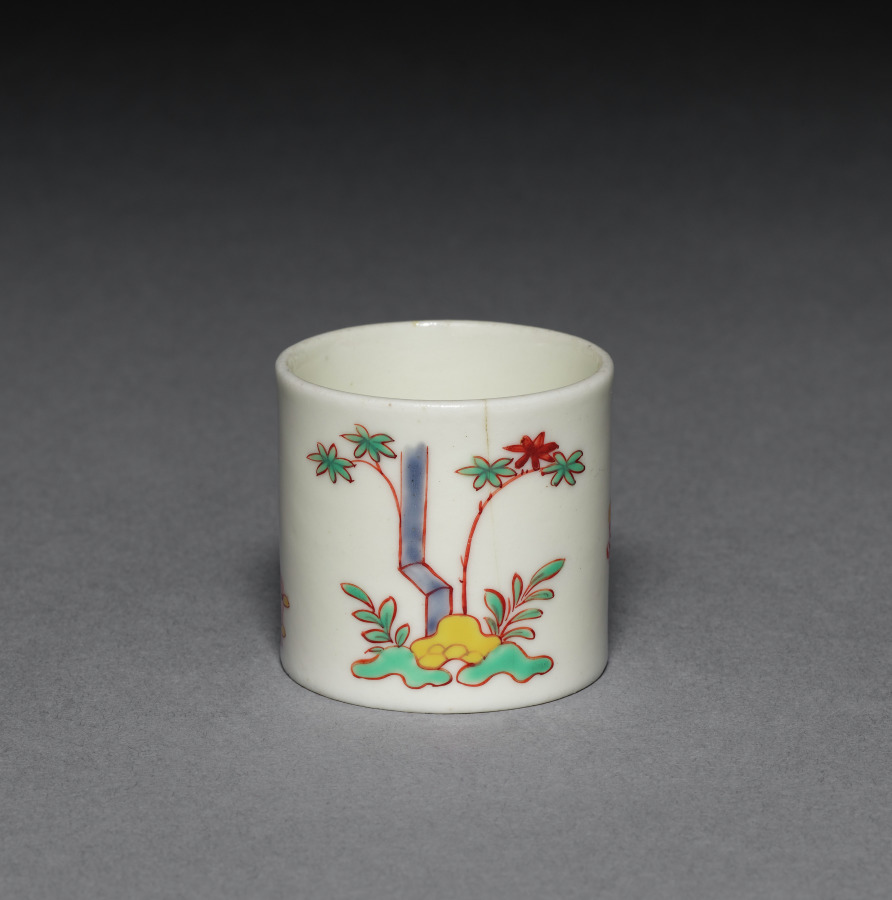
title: Pomade Pot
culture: France, 18th century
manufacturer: Saint Cloud Porcelain Factory (French)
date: c. 1730–40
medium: soft-paste porcelain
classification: Ceramic